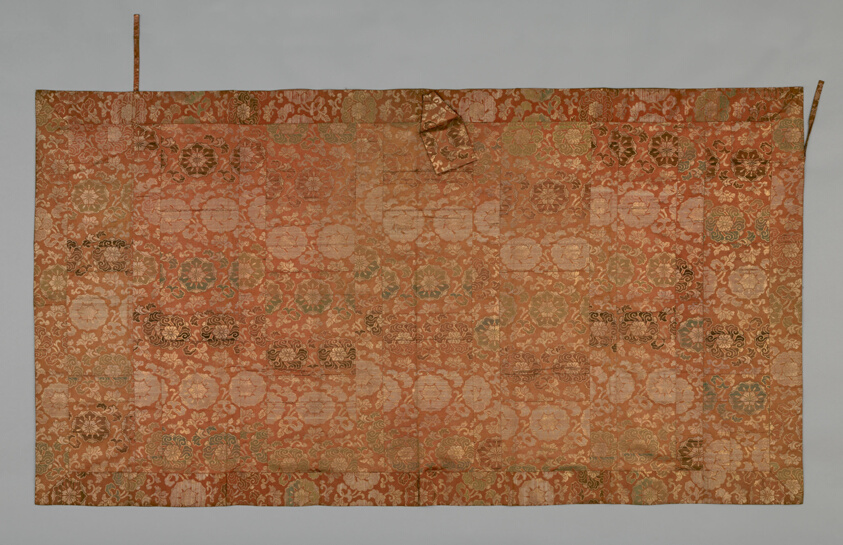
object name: Textile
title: Kesa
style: edo (japanese period), Japanism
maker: Japan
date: late Edo period (1789–1868), early 19th century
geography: Japan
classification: textile; costume; weaving; liturgical - buddhist